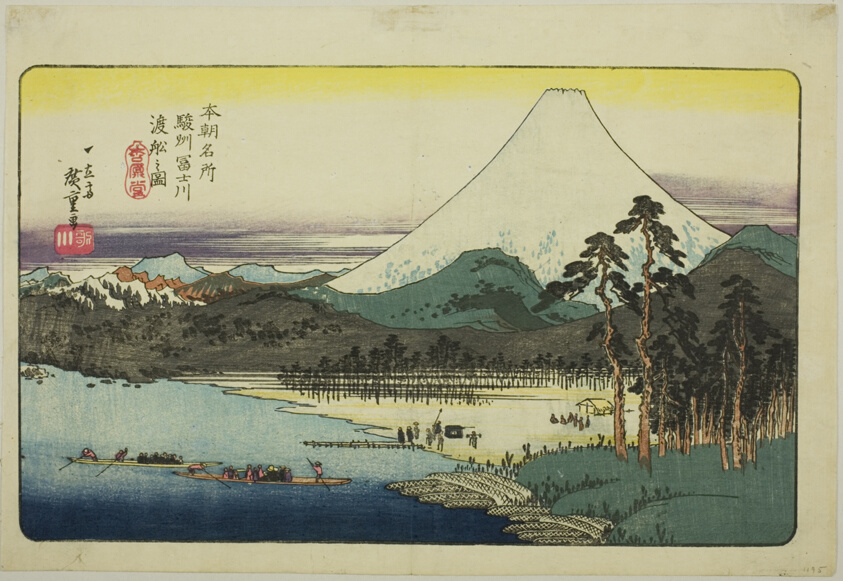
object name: Print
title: Ferry Boats Crossing the Fuji River in Suruga Province (Sunshu Fujikawa watashibune no zu), from the series "Famous Places of Japan (Honcho meisho)"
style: Japanese (culture or style)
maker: Utagawa Hiroshige 歌川 広重; Japanese, 1797-1858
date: c. 1837/39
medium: Color woodblock print; oban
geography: Japan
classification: woodblock print; print; asian art